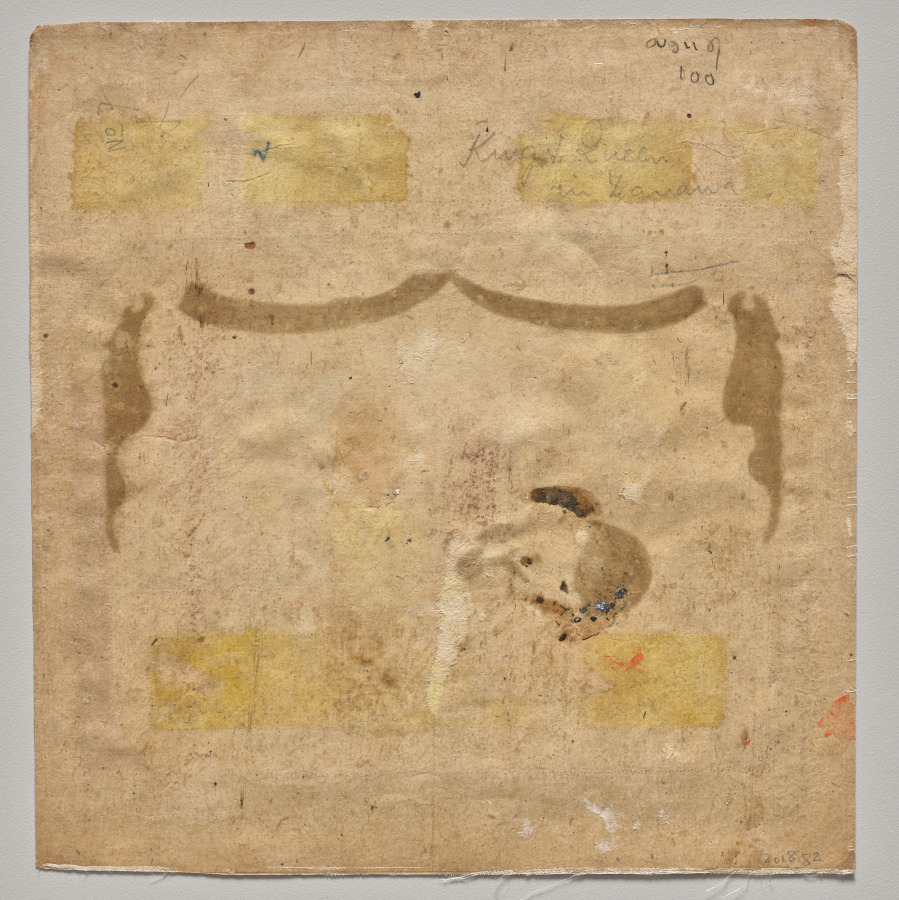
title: Sanehi Ragini, from the “Second Basohli" Ragamala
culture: Northern India, Pahari kingdoms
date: c. 1690–95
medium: gum tempera, ink, and gold on paper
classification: Painting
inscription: īsanehī rāginī bhero dī bharjā. 3.